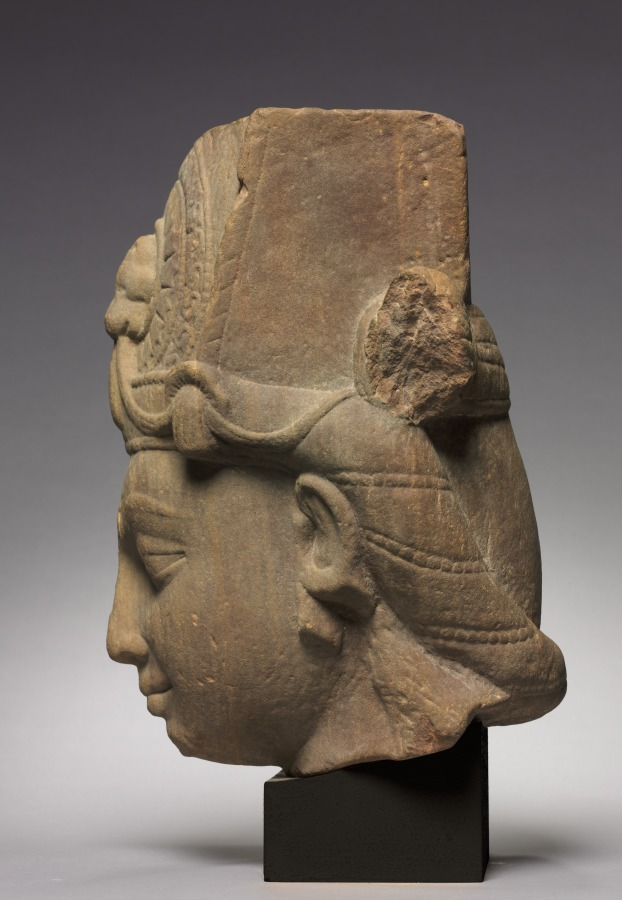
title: Head of Vishnu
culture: Central India, Madhya Pradesh, Vidisha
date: 300s CE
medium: sandstone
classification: Sculpture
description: When complete, this iconic image of the Hindu god Vishnu would have been impressive in scale, approximately life-size. During the Gupta period (c. 319–550 CE), images of Vishnu included a lion head in the center of the crown. The lion communicated royal authority, solar radiance, and the concept of glory. These attributes characterize the power and personality of this deity who ensures the preservation of his creation.